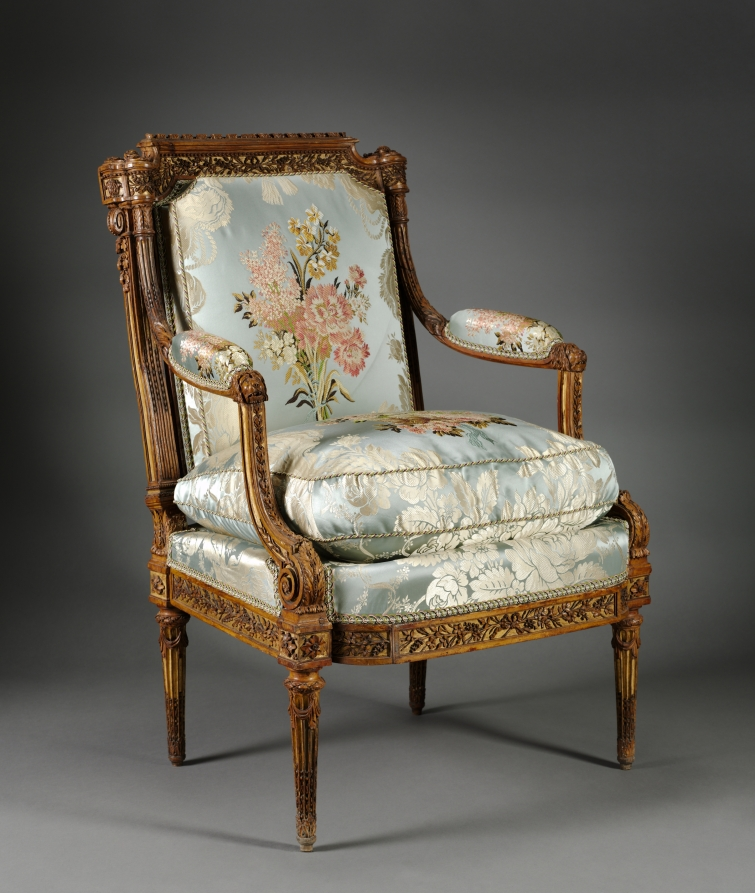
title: Armchair (Fauteuil) (2 of 2)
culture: France, 18th century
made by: Nicolas-Denis Delaisement (French)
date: c. 1785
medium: boxwood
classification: Furniture and woodwork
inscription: signed on front and back of frame of seat underneath: Delaisement with inverted "s."